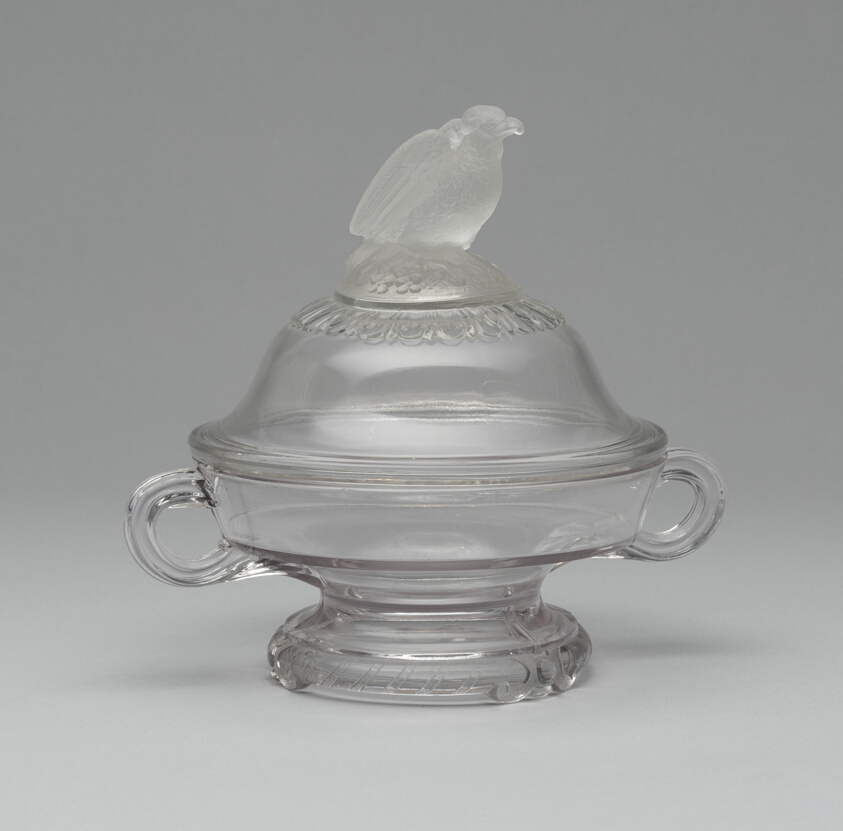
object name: Glass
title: "Old Abe/Frosted Eagle" covered footed dish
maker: Attributed to Crystal Glass Company; Bridgeport, Ohio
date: 1880–90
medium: Glass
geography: Ohio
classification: dish (vessel); glass; american decorative arts; american arts; decorative arts